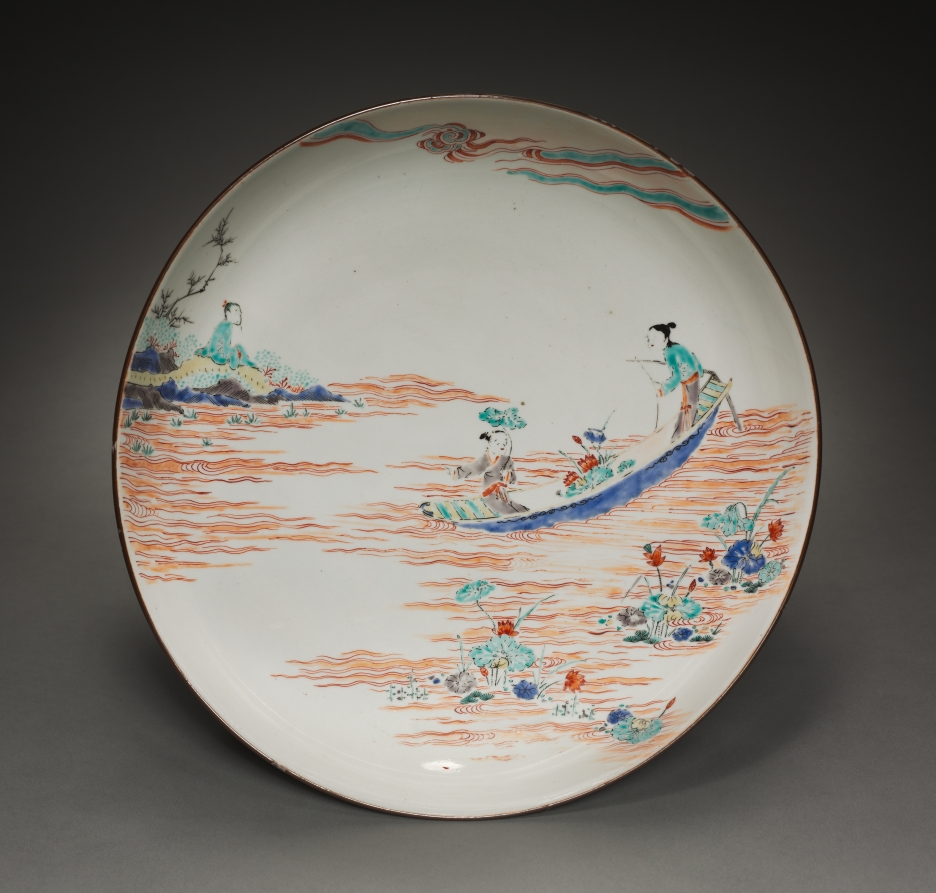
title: Dish with Zhou Maoshu Admiring Lotus Flowers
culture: Japan, Edo period (1615–1868)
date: late 1600s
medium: Porcelain with overglaze color enamel and iron oxide rim (Arita ware)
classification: Ceramic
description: This dish portrays Chinese scholar Zhou Dunyi—also known as Zhou Maoshu (1017–1073)—appreciating lotuses, a motif borrowed from Chinese porcelains. The ceramics painter of this work depicted Zhou seemingly appreciating both the lotus and the young lady with a lotus in the boat.